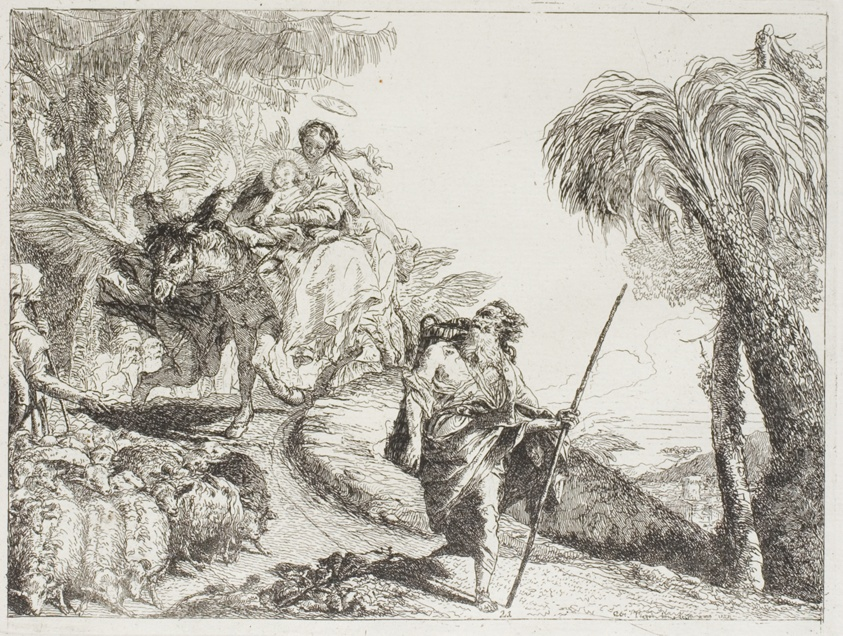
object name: Print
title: The Holy Family Descending a Forest Path, Near a Flock and Some Shepherds, plate 21 from The Flight into Egypt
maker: Giovanni Domenico Tiepolo (Italian, 1727-1804)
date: 1753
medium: Etching on paper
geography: Italy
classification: etching; print; prints and drawing